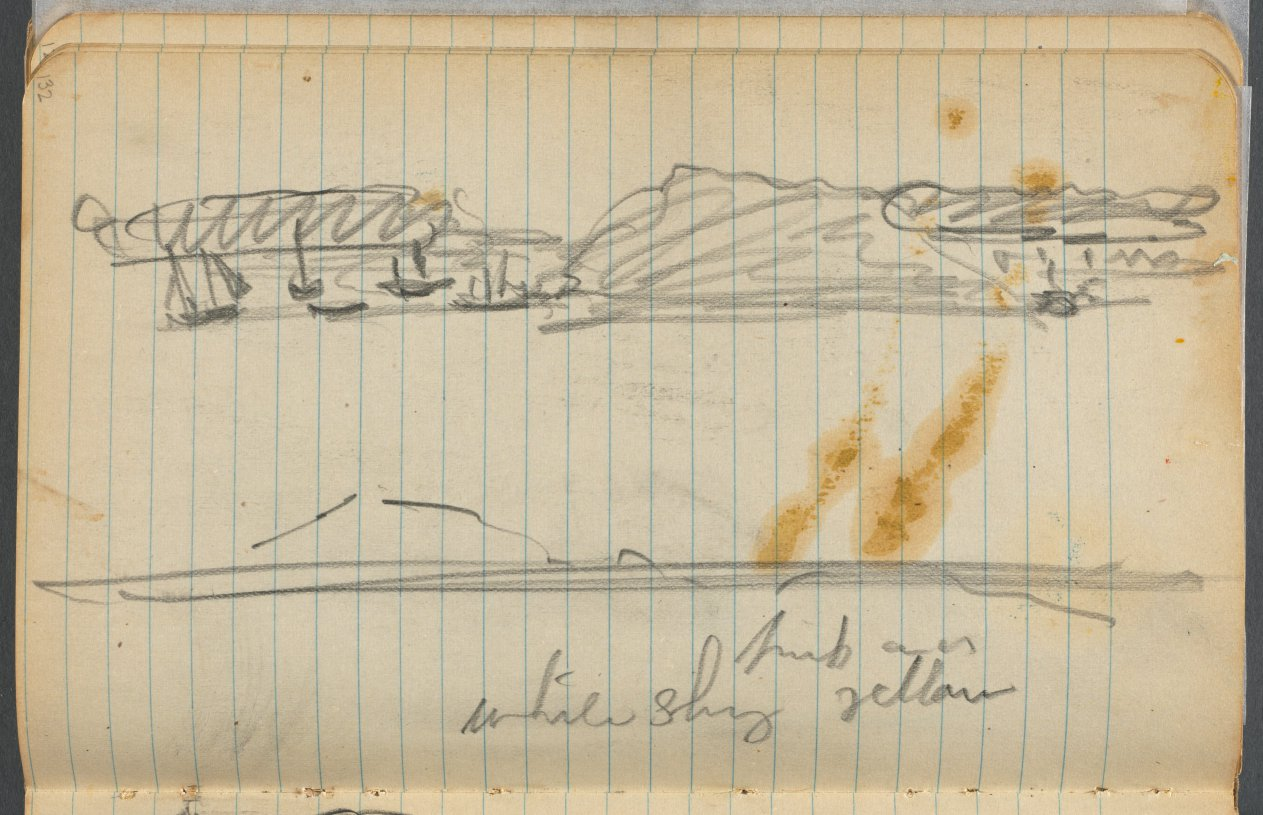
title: Sketchbook, page 132: Marine View with color notations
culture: America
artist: Maurice Prendergast (American, born Newfoundland [now Canada], 1858–1924)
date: 1905–10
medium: graphite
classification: Bound Volume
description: This sketchbook contains 69 pages of drawings, a diary largely devoted to the state of the artist's health, and a three-page discourse on the nature of genius and ideas.